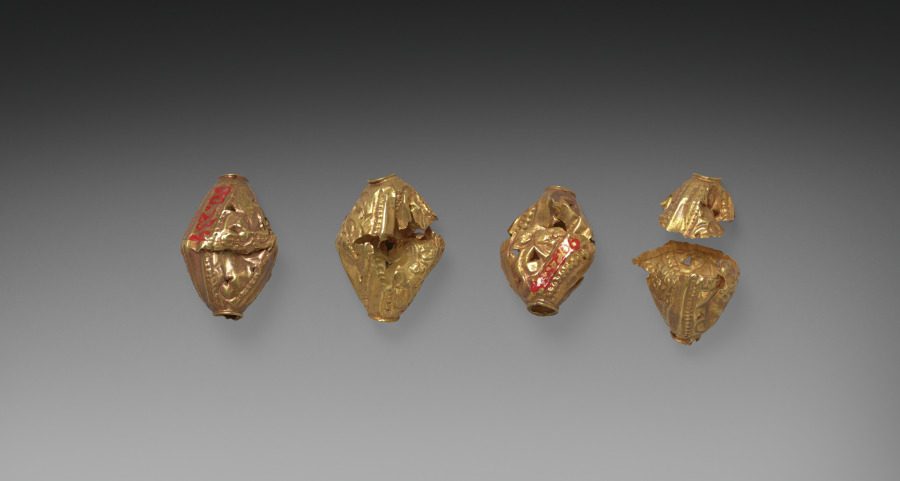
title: Beads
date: after 1519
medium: gold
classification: Jewelry